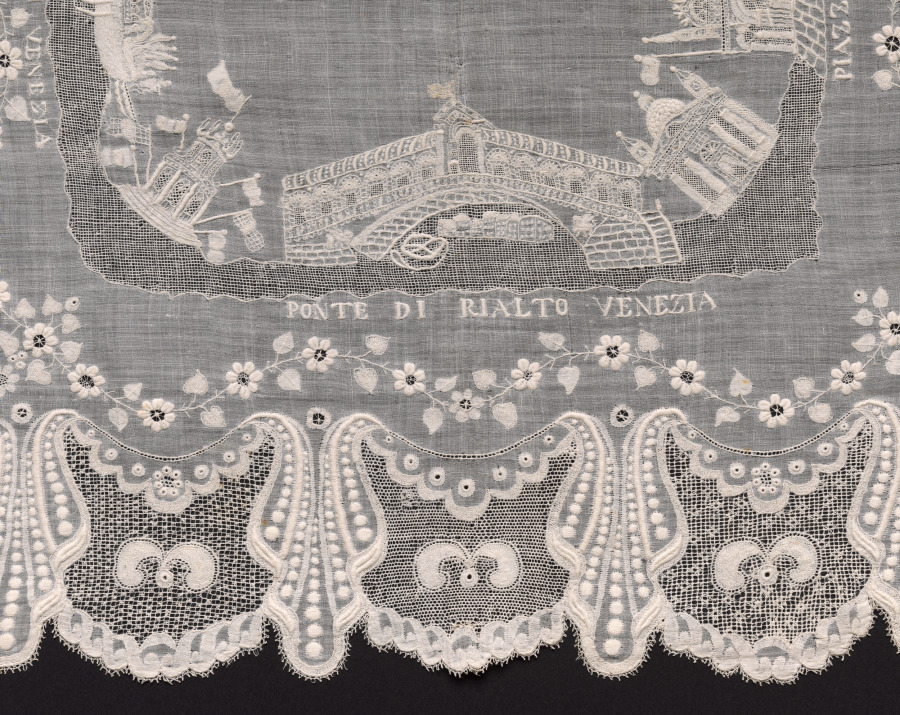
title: Handkerchief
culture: Italy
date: 1800s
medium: Plain weave linen with needle lace (drawnwork) and embroidery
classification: Embroidery